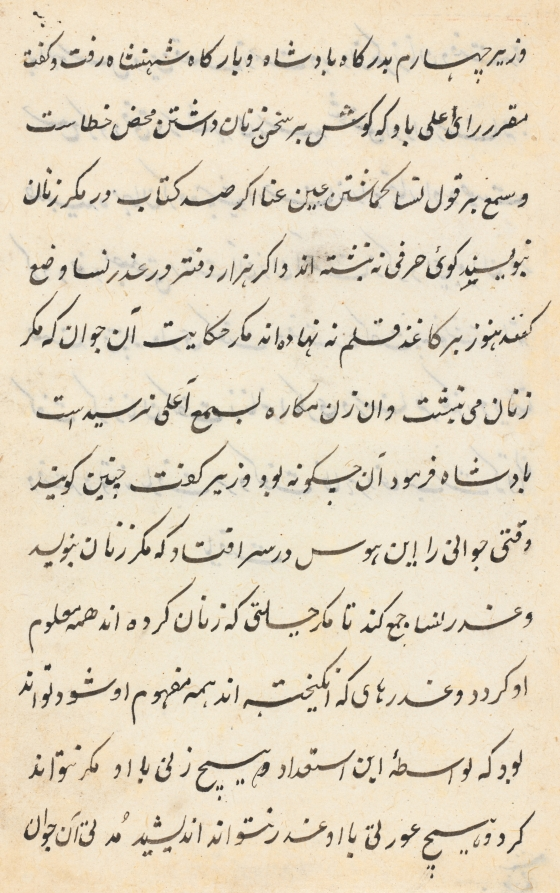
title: Page from Tales of a Parrot (Tuti-nama): text page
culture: Mughal India, court of Akbar (reigned 1556–1605)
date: c. 1560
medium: gum tempera, ink, and gold on paper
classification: Painting